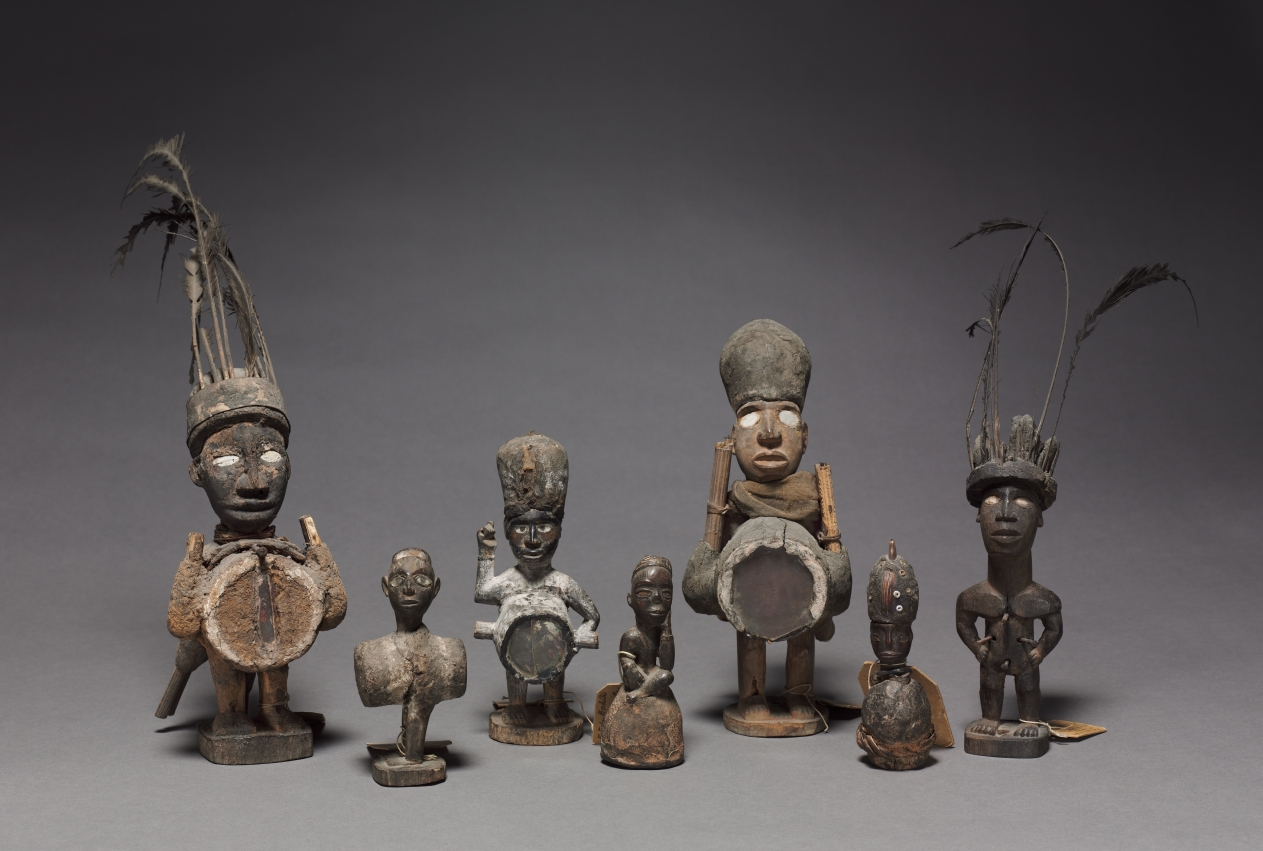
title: Power figure (nkisi)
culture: Central Africa, Republic of the Congo, Kongo people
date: late 1800s-early 1900s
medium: Wood, organic materials (including resin), probably kaolin, and metalized glass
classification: Sculpture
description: This figure is of the nduda type, characterized by the attached "guns" loaded with gunpowder and used to shoot witches. It is the only figure that adopts the threatening pose: the right hand raised, holding a spear or knife, and the left hand resting on the hip. Two guns protrude horizontally on both sides of the cylindrical medicine pack on the belly, covered with a round piece of mirror.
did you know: This is the only figure in a group of seven found in a French antique shop adopting a threatening pose.